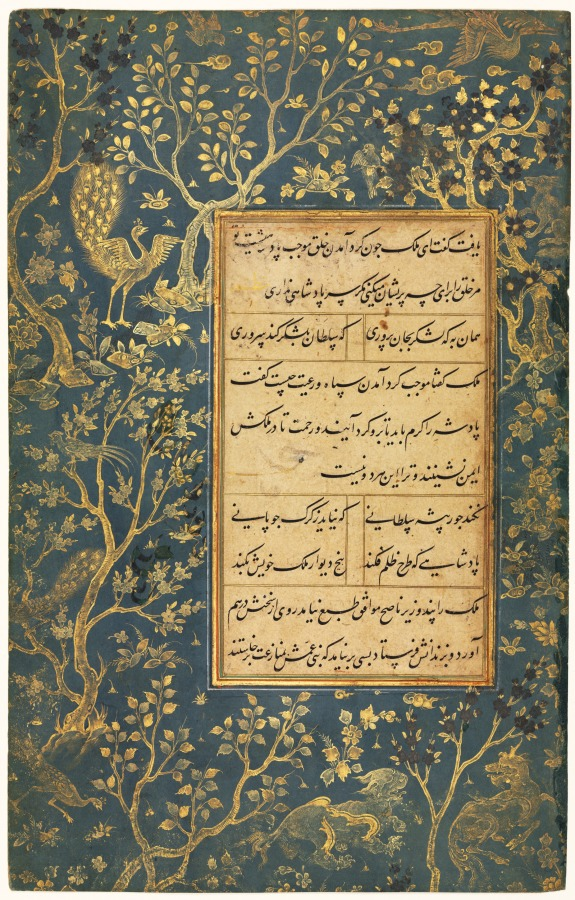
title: Illuminated Folio from a Gulistan (Rose Garden) of Sa'di (c. 1213–1291)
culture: Iran, Tabriz, Safavid period (1501-1722)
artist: style of Sultan Muhammad (Iranian)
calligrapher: style of Sultan 'Ali al-Mashadi (Iranian, 1430–1520)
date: c. 1475–1500; border: c. 1550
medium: Gum tempera, ink, gold, and silver on paper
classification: Manuscript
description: In the border surrounding the Persian poetical text, deer and a lion coexist peacefully in a forest. This imagery may reference the rule of a righteous king. The text is from the Gulistan, one of the most celebrated works of Persian literature, completed around 1258. Gulistan means “Rose Garden” in Persian; just as a rose garden is a collection of flowers, the contents are a collection of anecdotes. This page is from the section “On the Conduct of Kings.”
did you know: Written in both prose and verse, the Gulistan was used for centuries as a primer for schoolchildren in greater Iran, India, and Turkey.